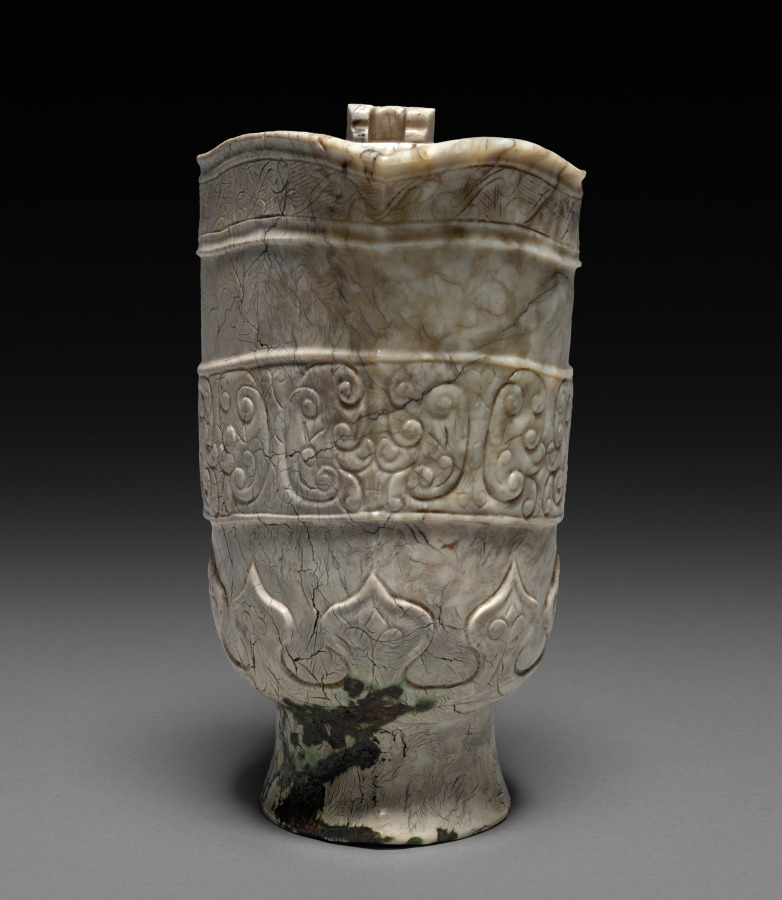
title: Ewer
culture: China, Ming dynasty (1368–1644)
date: 1700s or later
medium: jade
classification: Jade